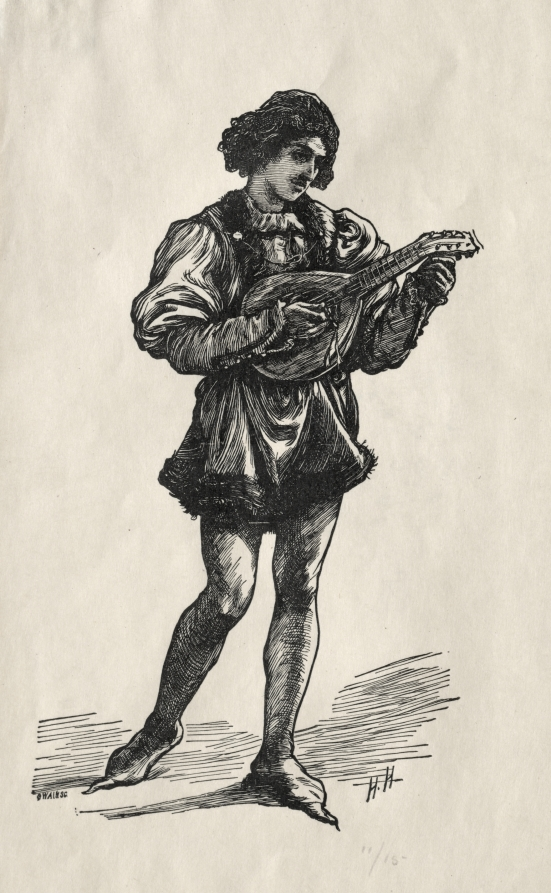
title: A Troubadour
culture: England, 19th century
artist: Joseph Swain (British, 1820–1909)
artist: after Hubert von Herkomer (British, 1849–1914)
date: 1864–1909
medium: wood engraving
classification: Print